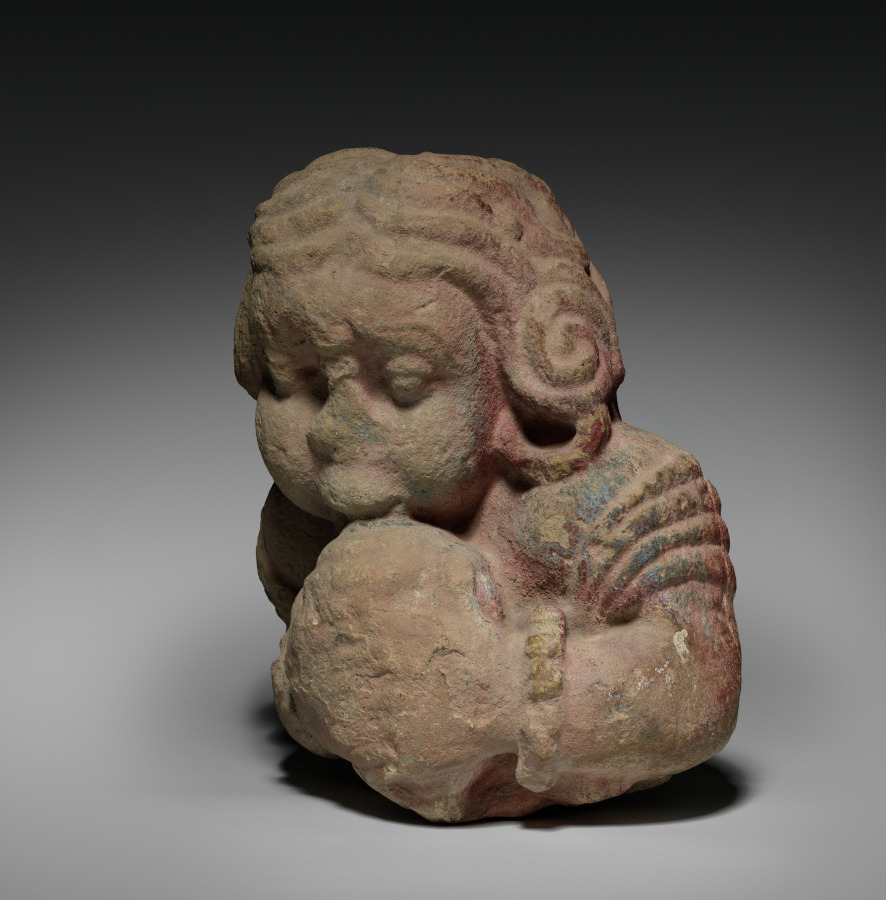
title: Shivagana Blowing Conch Shell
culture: India, Sarnath, Gupta Period, 5th Century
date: c. 400s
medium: stone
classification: Sculpture